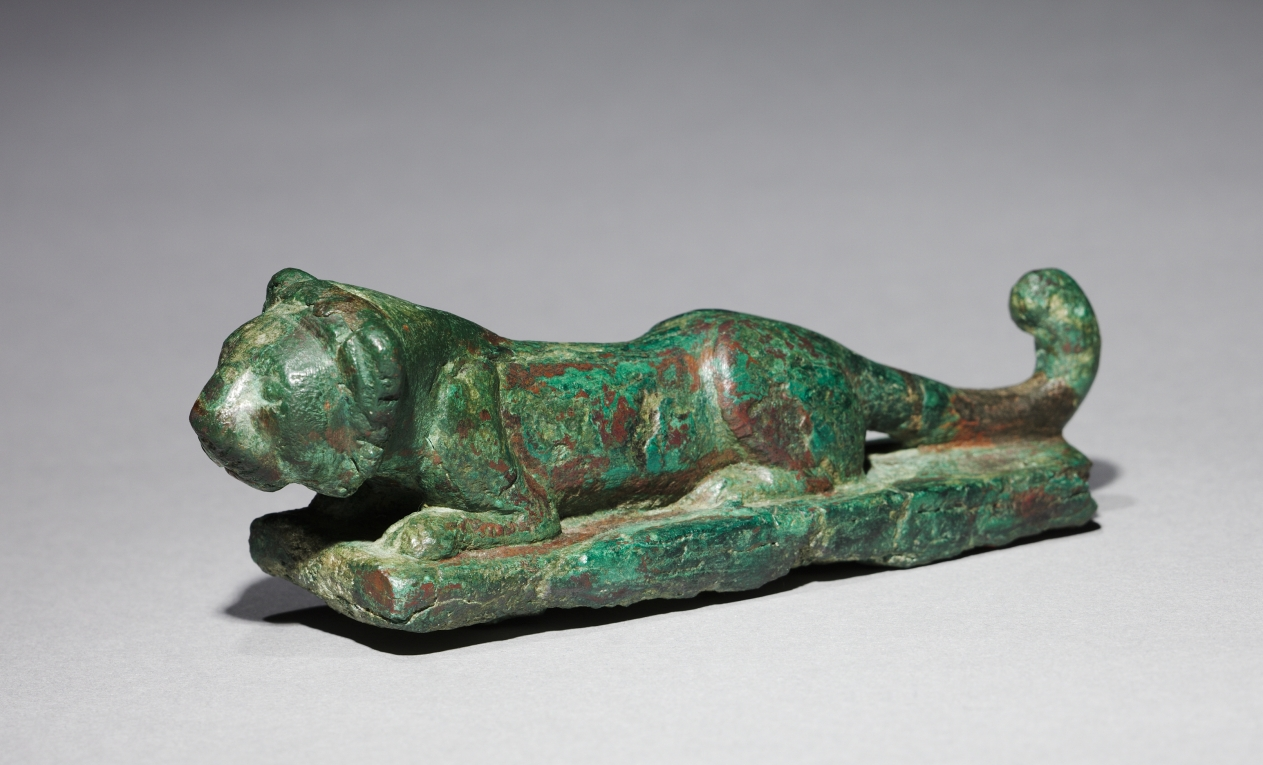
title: Lioness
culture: Sumerian, Iraq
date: c. 2100 BCE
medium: copper alloy, lost-wax cast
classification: Sculpture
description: Crouched in the stance of a hunter stalking its prey, this diminutive lioness possesses the latent power of a predator about to strike. In the ancient Near East, the ferocity and strength of lions was often associated with rulers and gods through symbolic imagery.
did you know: The fierce and powerful nature of lions was often associated with rulers through symbolic imagery.